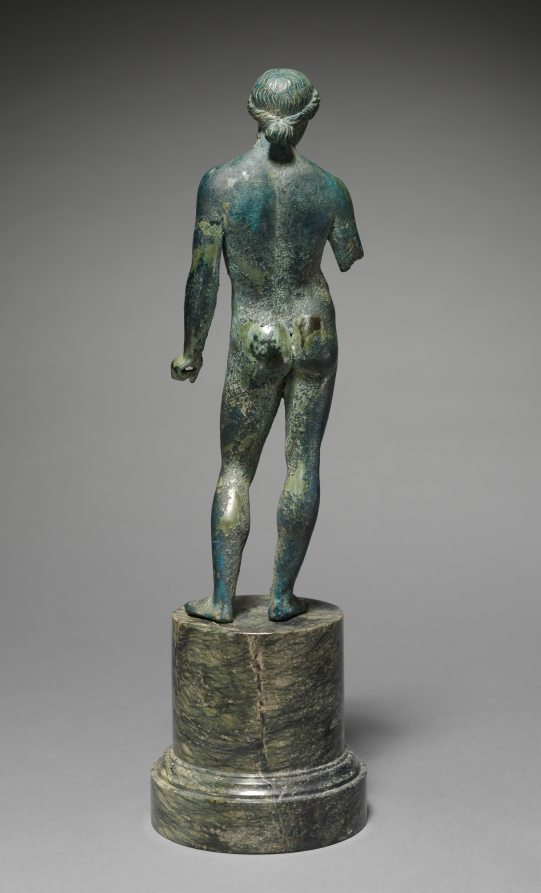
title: Athlete or Apollo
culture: Greece, Macedonia(?)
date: probably 100–1 BCE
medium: bronze with silver inlays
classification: Sculpture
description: This bronze statuette depicts a nude male, perhaps a young athlete or the youthful god Apollo. The figure is made from solid bronze, with a fillet of inlaid silver on his head. The figure’s right arm is broken off just above the elbow. If this is a statue of Apollo, he may have once held a bow and arrow; if it depicts an athlete, he could have held athletic equipment, a symbol of victory, or an offering dish.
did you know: The eyes of this figure are decorated with inlaid silver.